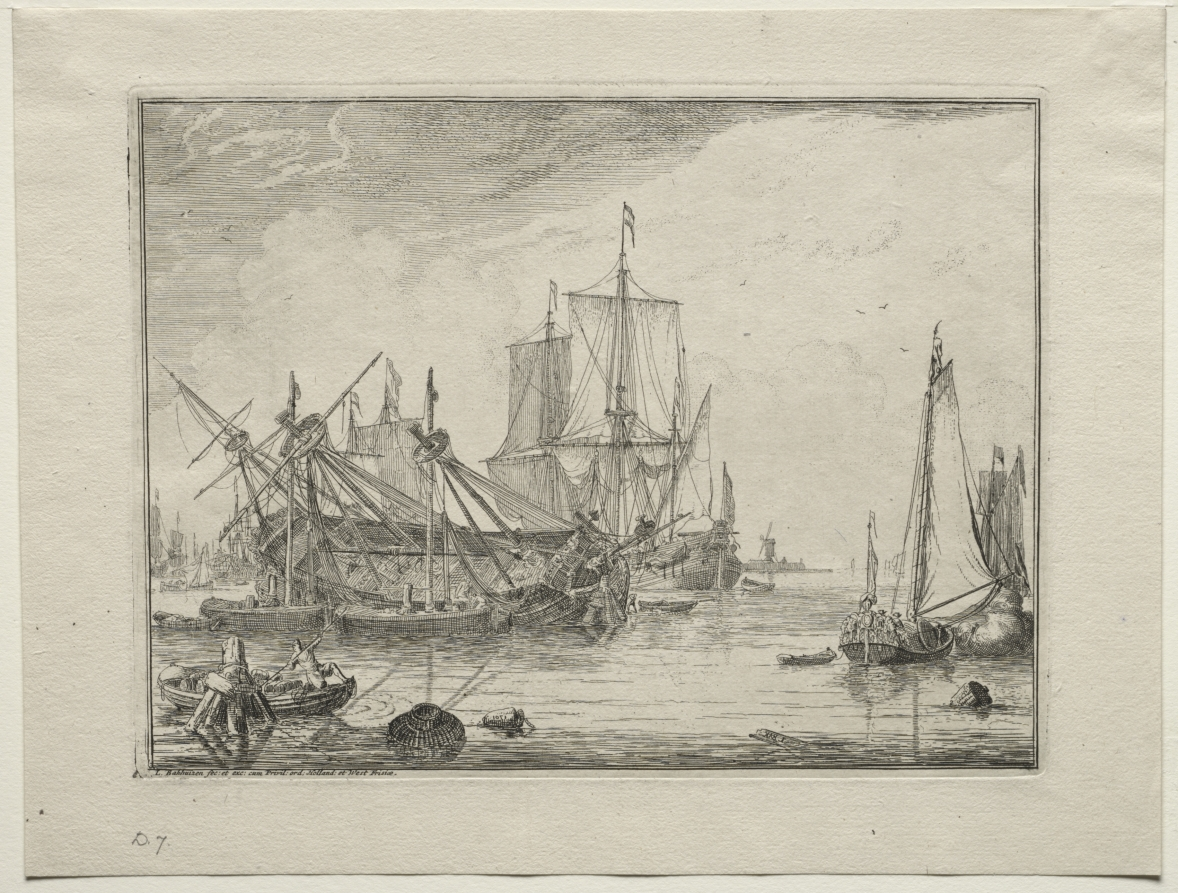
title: Ships Under Repair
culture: Netherlands, early 18th century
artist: Ludolf Backhuysen (Dutch, 1631–1708)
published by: Ludolf Backhuysen (Dutch, 1631–1708)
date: 1701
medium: etching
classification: Portfolio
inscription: lower left, in plate: L. Bakhuizen fec: et exc: cum Privil: ord: Holland: et West Frisiæ. ; lower center, in plate: 1701[in reverse] ; lower right, in plate: L BAK[reversed] ; lower left, in graphite: D. 7.